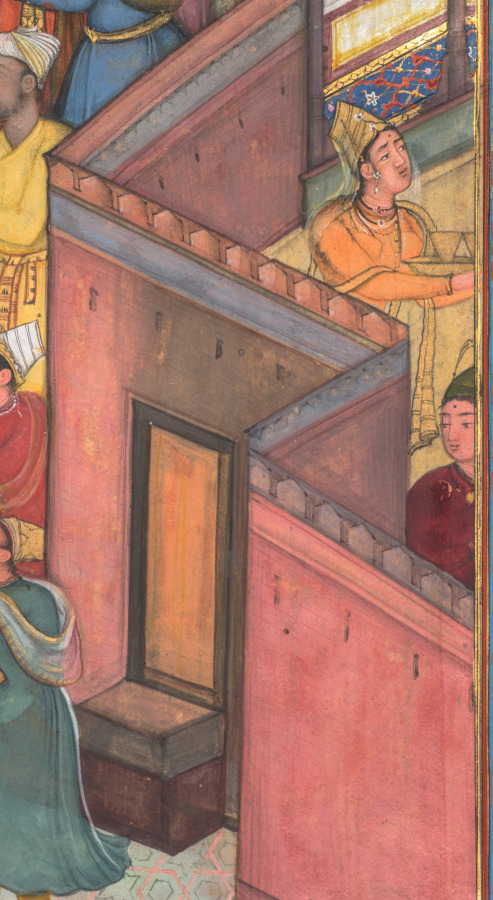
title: Circumcision ceremony for Akbar’s sons, painting 126 from an Akbar-nama (Book of Akbar) of Abu’l Fazl (Indian, 1551–1602)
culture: Mughal India, court of Akbar (reigned 1556–1605)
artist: attributed to Dharam Das (Indian, active c. 1580–1605)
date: c. 1602–3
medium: gum tempera, ink, and gold on paper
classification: Painting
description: This page is from a copy of the biography of Akbar that was completed not long before his death in 1605. It depicts him much younger, during the festivities held on October 22, 1573, in his newly built capital city of Fatehpur Sikri, near Agra, on the occasion of the circumcision ceremony for his three young sons. Dancers in Chaghatai Turkish dress perform as Akbar’s weight in gold is being distributed to the poor. Akbar wears a simple white tunic, or jama, stained at the armpits by aromatic musk. A curved dagger in a red velvet sheath is tucked into his golden sash, and he is crowned with a white crested turban.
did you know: An attendant strokes Akbar’s hunting falcon, perched on a glove.